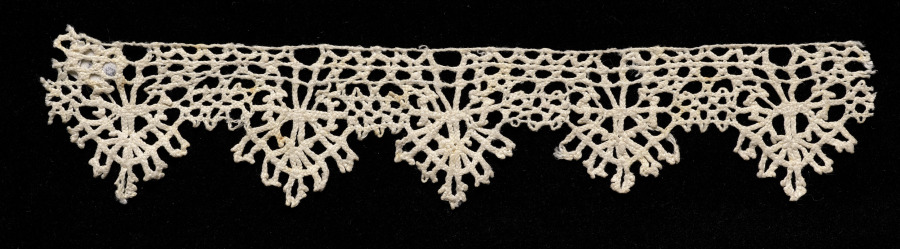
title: Lace Edging of Points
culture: Italy, Venice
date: 1580–99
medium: Bobbin lace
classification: Lace